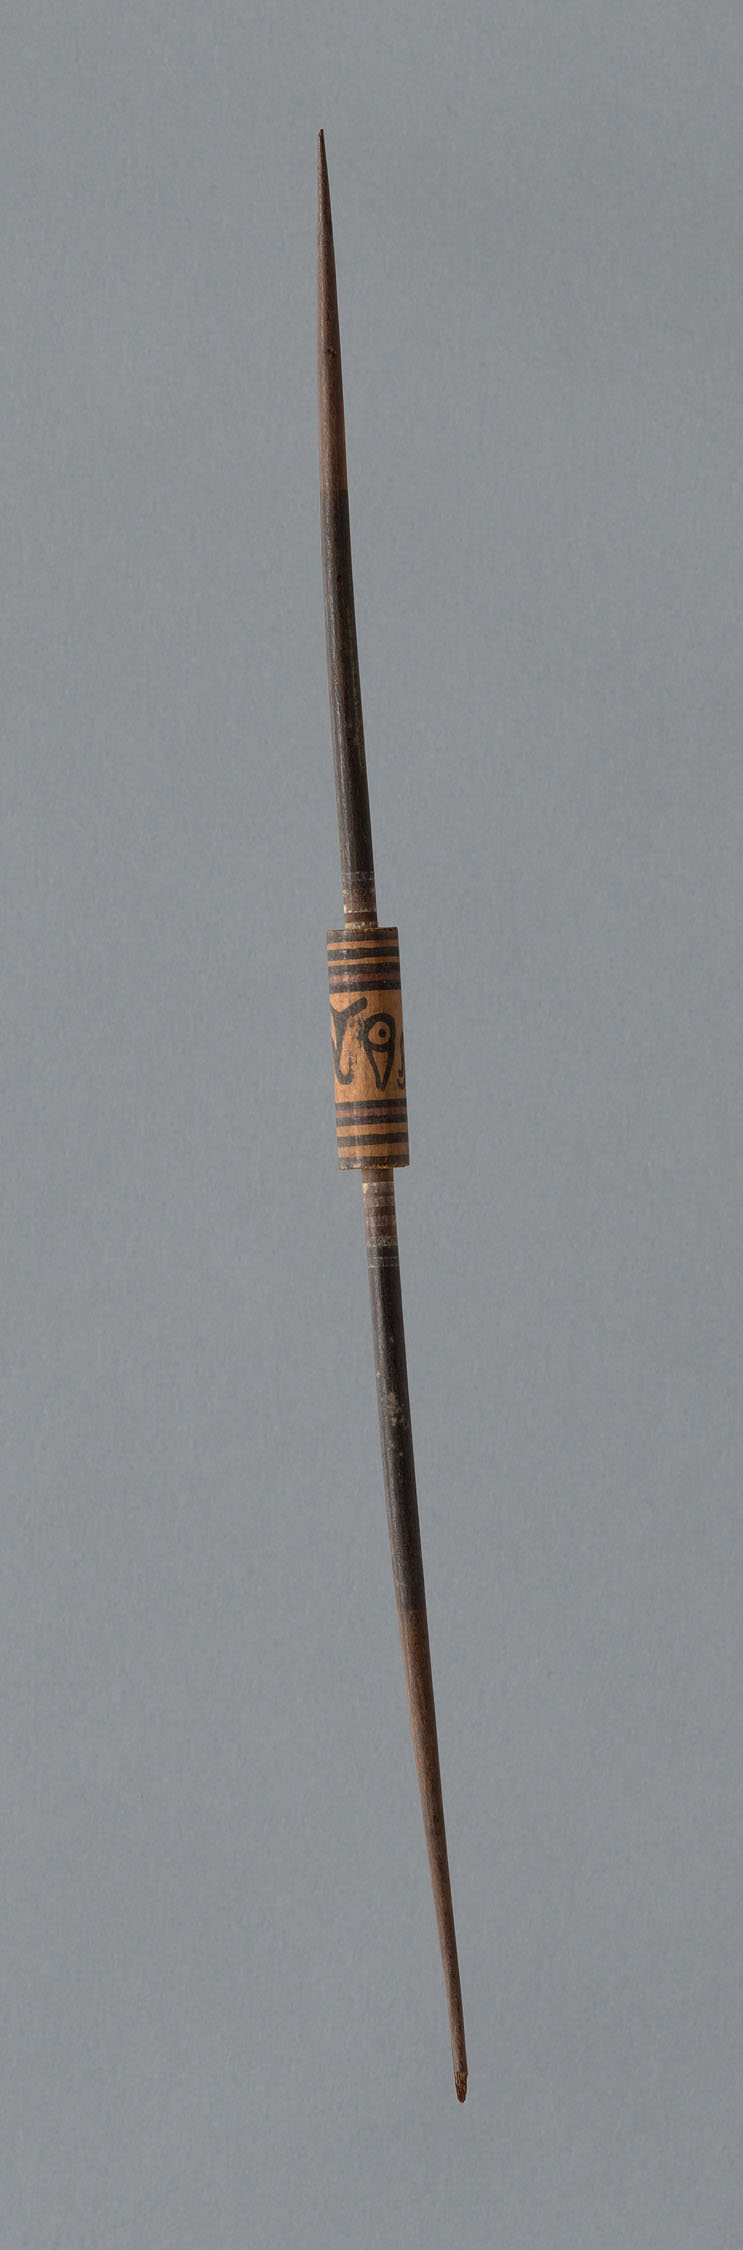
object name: non-art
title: Wooden Spindle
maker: Peru, Possibly central coast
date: 1000/1476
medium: Wood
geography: Peru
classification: spindles (textile working equipment); textile working equipment; accessories (object genre); textile